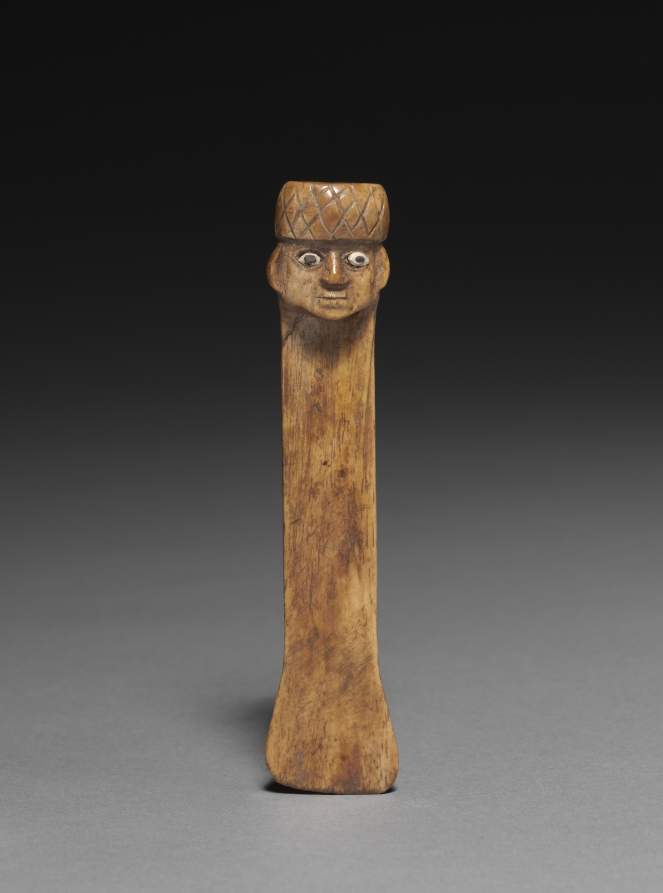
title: Spatula with Carved Head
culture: Peru, Wari style (500-900)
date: 500–900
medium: bone with shell inlay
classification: Jewelry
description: Peruvian Indians today regard coca leaf as a sacred substance that creates communion with supernatural forces. The leaves are chewed with powdered lime that in antiquity was stored in containers and scooped with spatulas like those seen here. Aside from its ritual meaning, coca has practical benefits: it is vitamin-rich; like coffee, it induces clear-headedness; and it increases stamina. The lizard spatula is Nasca in style; the other is Wari.